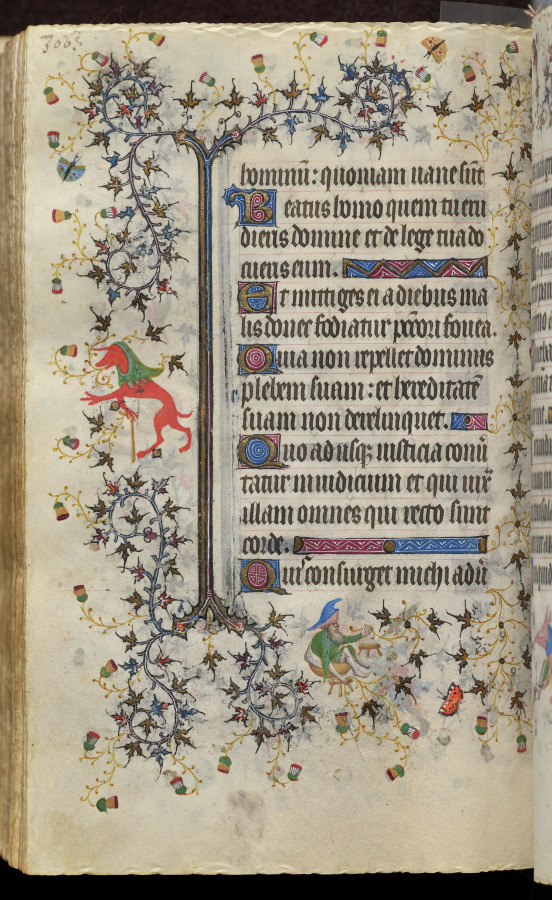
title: Hours of Charles the Noble, King of Navarre (1361-1425): fol. 153v, Text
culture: France, Paris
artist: Master of the Brussels Initials and Associates (French)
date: c. 1405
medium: ink, tempera, and gold on vellum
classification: Bound Volume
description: This precious volume was obviously highly prized by its owner, the French-born King of Navarre, who had his coat of arms painted on no less than twenty folios. Rather than directly commissioning this manuscript from a specific workshop, it seems that Charles the Noble acquired his book of hours -- perhaps ready-made for the luxury market -- while on a trip to Paris in 1404-05. A collaborative effort, six painting styles are evidenced within the pages of this codex, those of two Italians, two Frenchmen, and two Netherlanders. The painter who was responsible for the planning and decoration of the book, and who produced seventeen of the large miniatures, was a Bolognese artist known as the Master of the Brussels Initials. His principal assistant, responsible for most of the borders, was a Florentine who signed his name "Zecho" da Firenze on folio 208 verso.